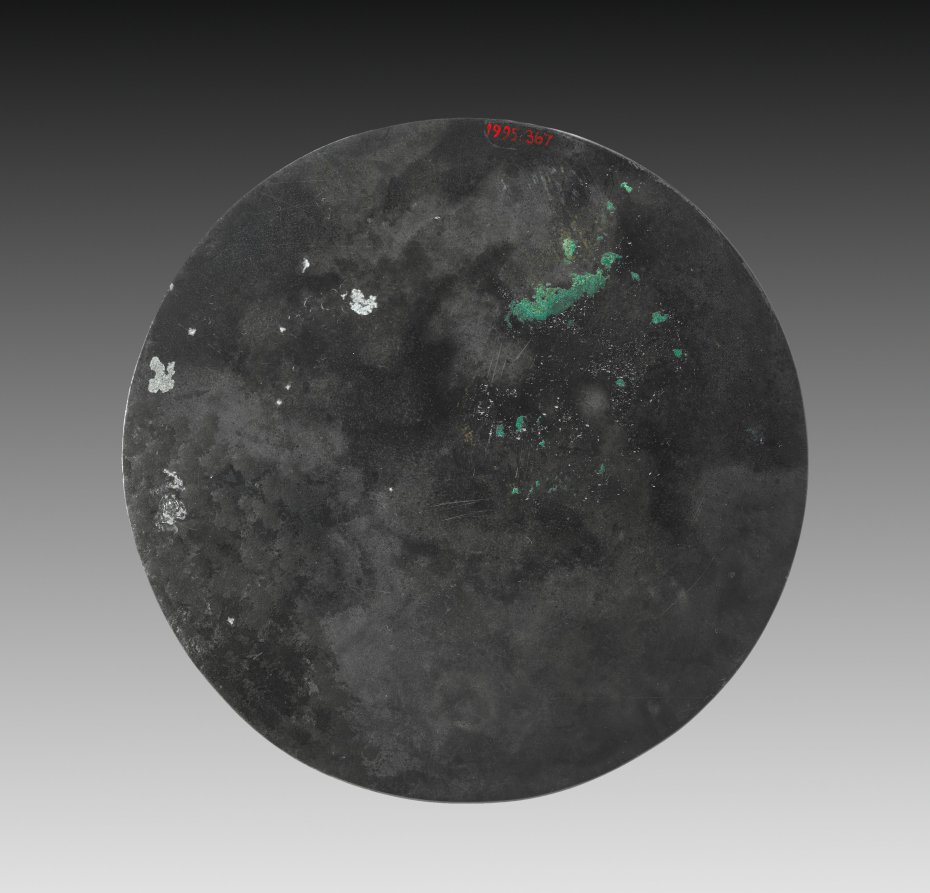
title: Mirror with a Coiling Dragon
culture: China, Tang dynasty (618-907)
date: 700s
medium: bronze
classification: Metalwork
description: Cast in high-tin and low-lead bronze by the lost wax method, this mirror has a dark and lustrous patina known as heiqigu (literally, “black lacquer antique”). It bears a design of a coiling dragon among trailing clouds. With a small, elongated head connecting to an S-curve of the neck that is as sinuous as the body and tail, the dragon of the Tang period is unique.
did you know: The patina of this mirror is known as heiqigu (literally, “black lacquer antique”).